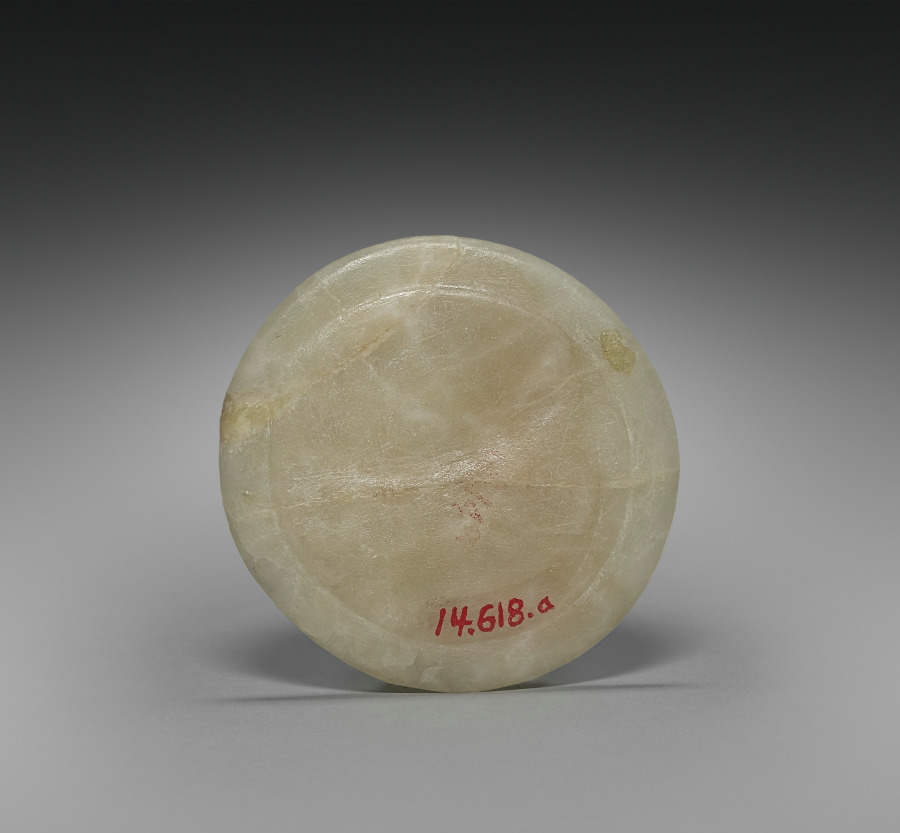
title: Long-Necked Flask with Strap Handle and Lid (Lid)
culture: Egypt, New Kingdom (1540–1069 BCE), Dynasty 18, reign of Tuthmosis III (1479–1425 BCE)–reign of Amenhotep III (1390–1352 BCE)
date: 1401–1353 BCE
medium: travertine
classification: Vessels